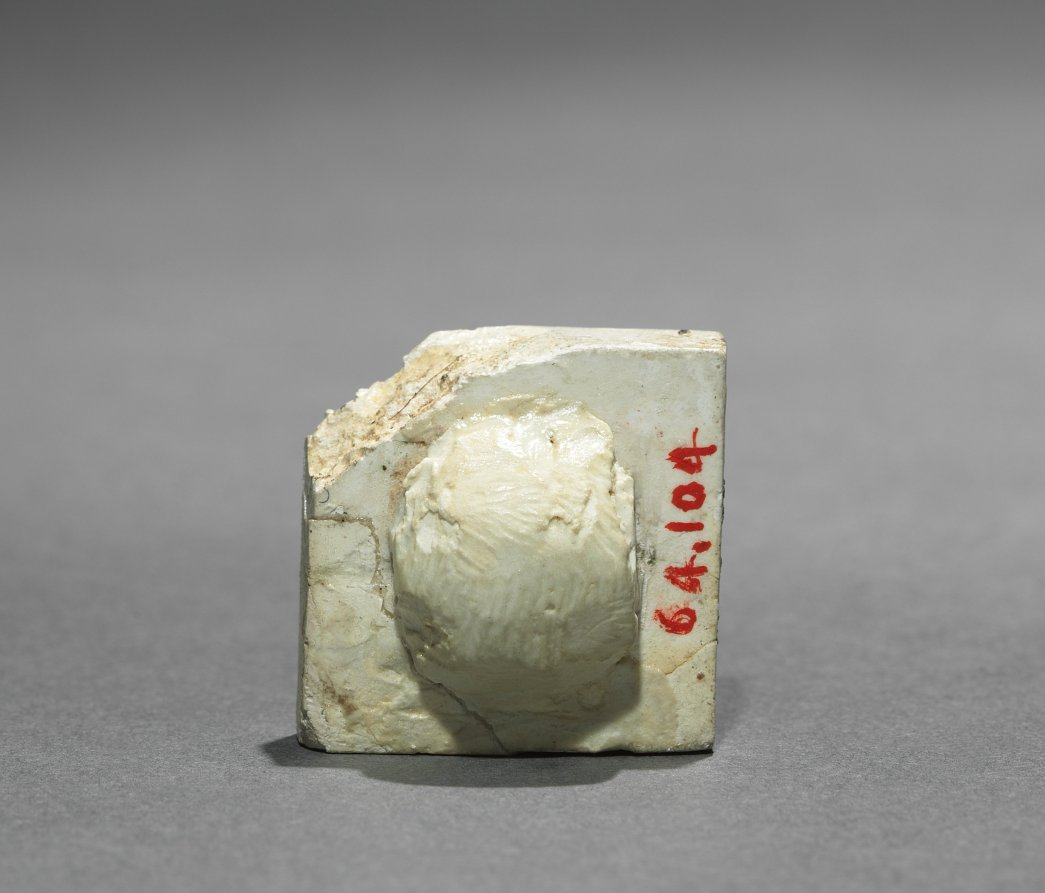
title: Seal with Unicorn and Inscription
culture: Pakistan, Indus Valley civilization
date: c. 2000 BCE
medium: possibly kaolin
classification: Seals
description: Small stone seals, probably used to identify merchandise or property, are among the most numerous objects surviving from the protohistoric urban sites along the banks of the Indus River system. This example has a bovine creature with one horn and one ear showing in profile, his head held over an altar-like object.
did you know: Animals are the most popular motifs in the visual culture of the Indus Valley Civilization, shown much more often than human figures or cityscapes.